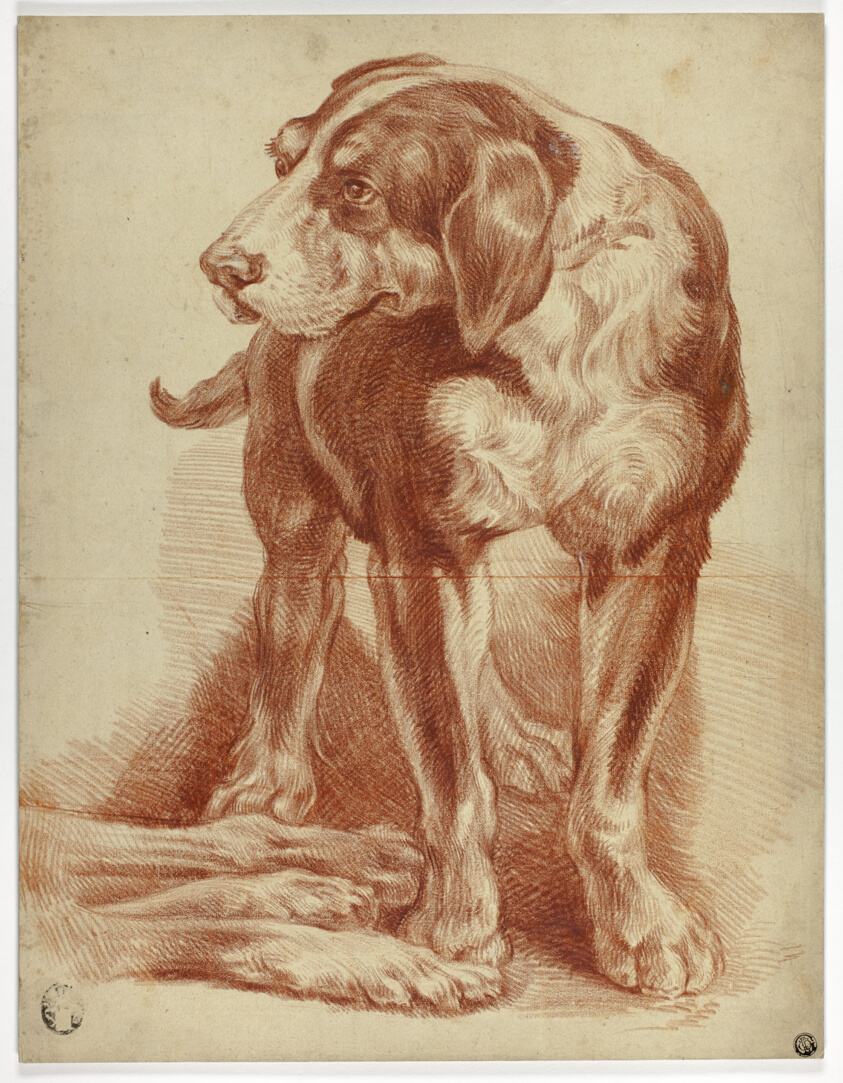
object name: Drawing and Watercolor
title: Hound Standing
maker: After Jean Baptiste Huet; French, 1745-1811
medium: Red chalk on cream laid paper, laid down on ivory wove paper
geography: France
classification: chalk; drawings (visual works); prints and drawing